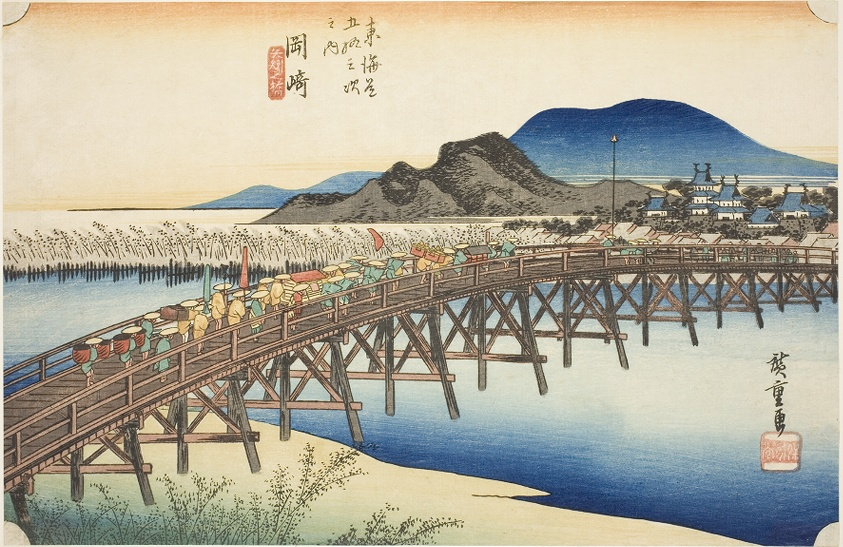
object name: Print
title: Okazaki: Yahagi Bridge (Okazaki, Yahagi no hashi), from the series "Fifty-three Stations of the Tokaido (Tokaido gojusan tsugi no uchi)," also known as the Hoeido Tokaido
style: Japanese (culture or style)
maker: Utagawa Hiroshige 歌川 広重; Japanese, 1797-1858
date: c. 1833/34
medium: Color woodblock print; oban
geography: Japan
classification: woodblock print; print; asian art